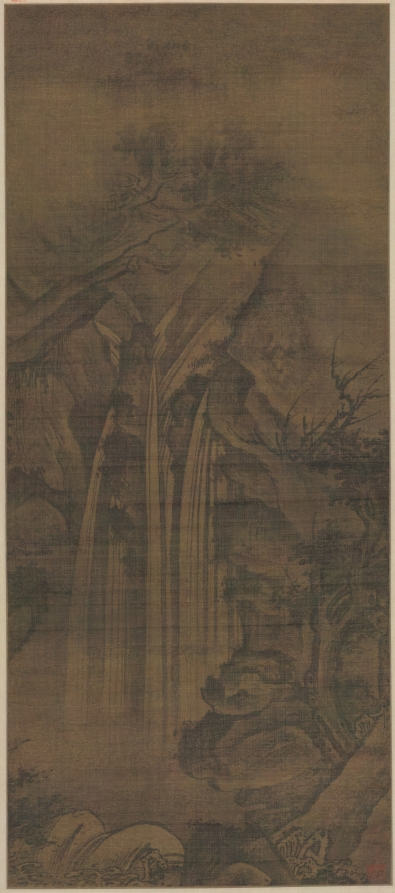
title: Waterfall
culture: China, Song dynasty (960-1279) - Yuan dynasty (1271-1368)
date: 1271–1368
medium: hanging scroll, ink and slight color on silk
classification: Painting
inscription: Label on the mounting with 2 seals of T'ang ? of Pi-ling (16th c.); label on back of mounting of Kü Kuang-hsü (1731-1797). 1 colophon and 8 additional seals: 1 colophon, dated 1625, and 2 seals of Kao P'an-lung (1562-1626); 2 seals of Liu Shu (1759-1816); 1 seal of Pi Lung (late 18th c.); 1 seal of Ts'ao tzu-wen; 2 seals unidentified. WKH